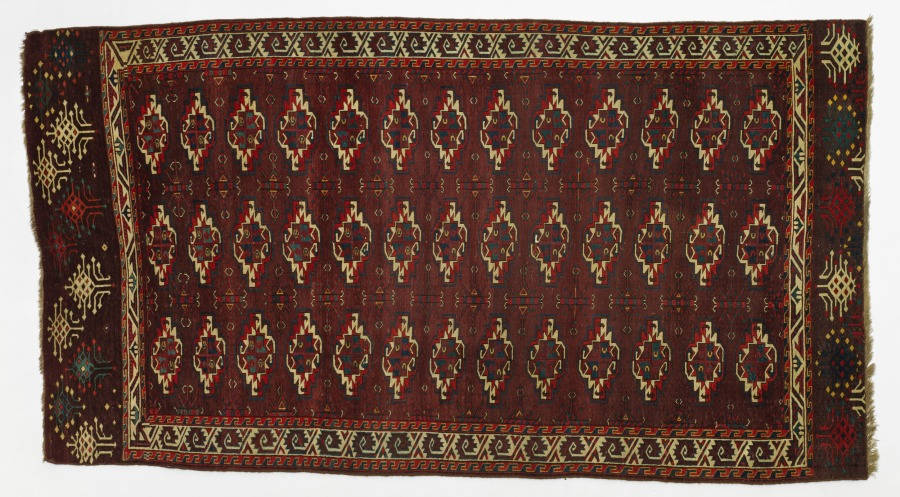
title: Turkmen Main Carpet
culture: Turkmenistan, Yomud tribe, 19th century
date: mid-1850s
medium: Wool, knotted pile, 128-136 symmetrical knots per square inch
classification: Carpet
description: In the Islamic world, carpets symbolize status and wealth. A carpet’s origin can be identified by its design, color, and technique. Shades of red and lobed motifs, or guls, are hallmarks of Turkmen carpets woven by nomadic tribes across northeast Iran, Afghanistan, and central Asia. This main carpet of the Yomud tribe features beautiful colors in the guls on a rich aubergine ground; the decorated skirts, or elem, with stylized flora at each end, are its rarest feature. This carpet would have been the prized possession within the living quarters of a round tent, or yurt.